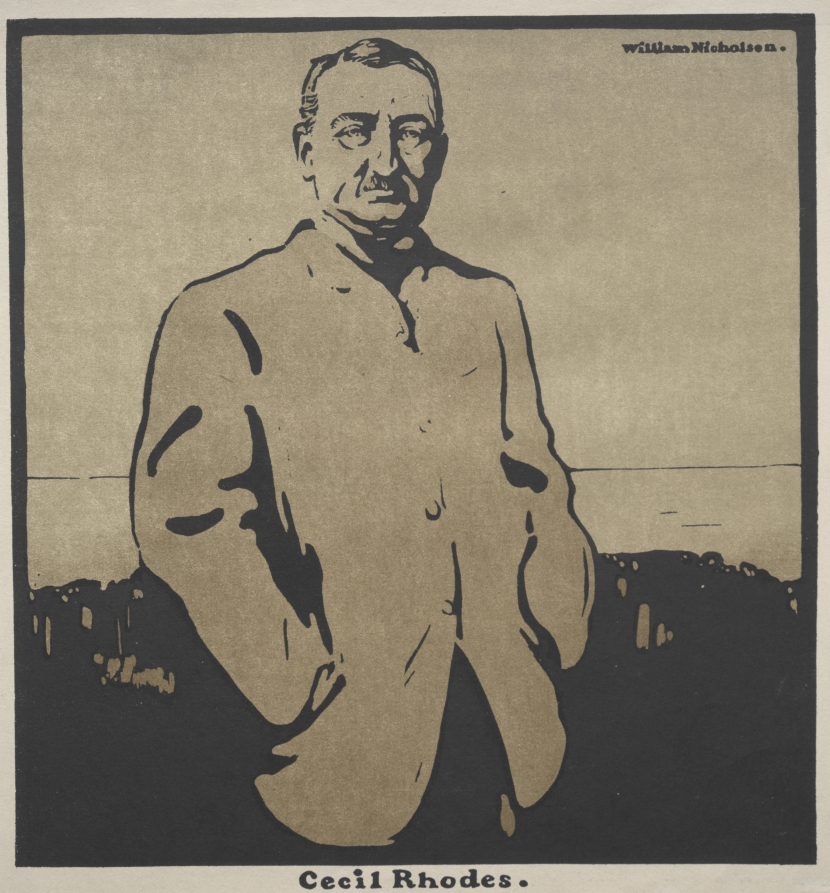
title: Cecil Rhodes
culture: England, 20th century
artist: William Nicholson (British, 1872–1949)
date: 1899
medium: color lithograph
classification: Print